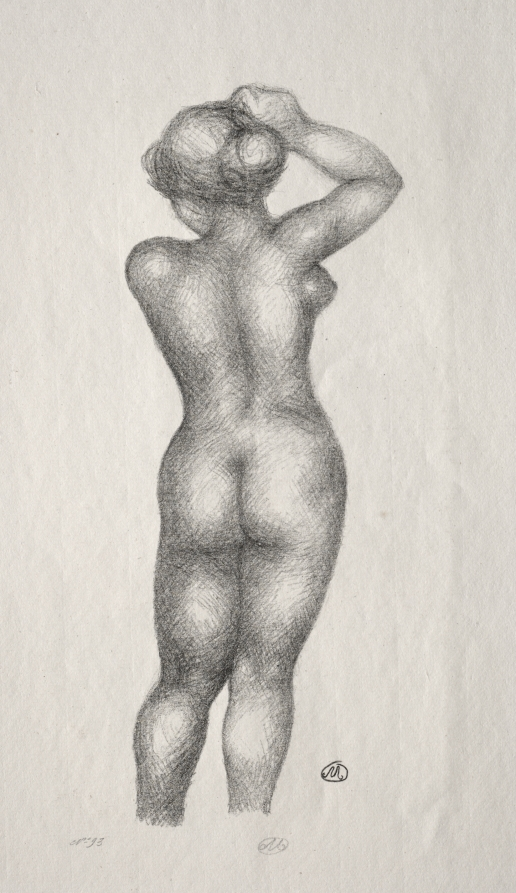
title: Nude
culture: France, 20th century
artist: Aristide Maillol (French, 1861–1944)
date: c. 1900–1944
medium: lithograph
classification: Print